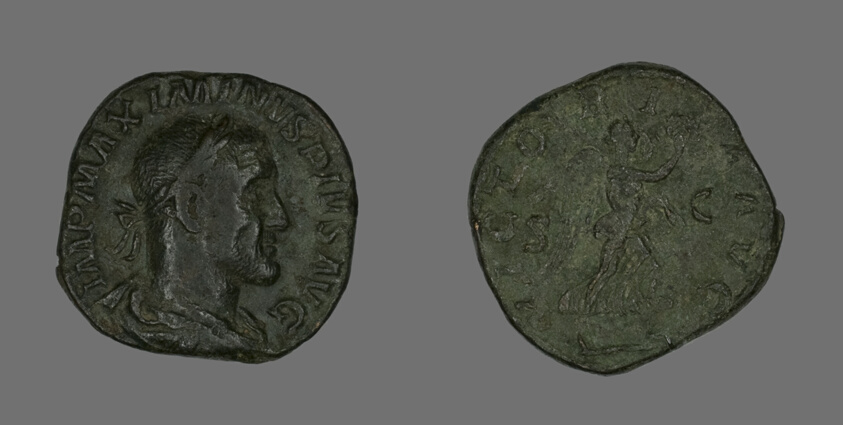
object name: Coin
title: Sestertius (Coin) Portraying Emperor Maximinus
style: roman (ancient, style or period)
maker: Roman, minted in Rome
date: 235-238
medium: Bronze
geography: Roman Empire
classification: coin; ancient art